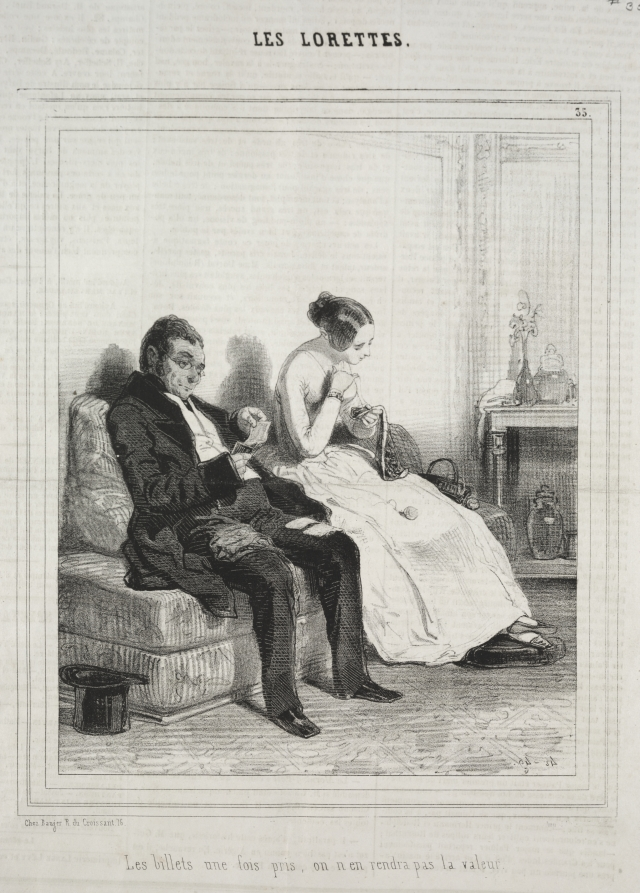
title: Les Lorettes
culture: France, 19th century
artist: Paul Gavarni (French, 1804–1866)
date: 1842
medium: lithograph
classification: Print